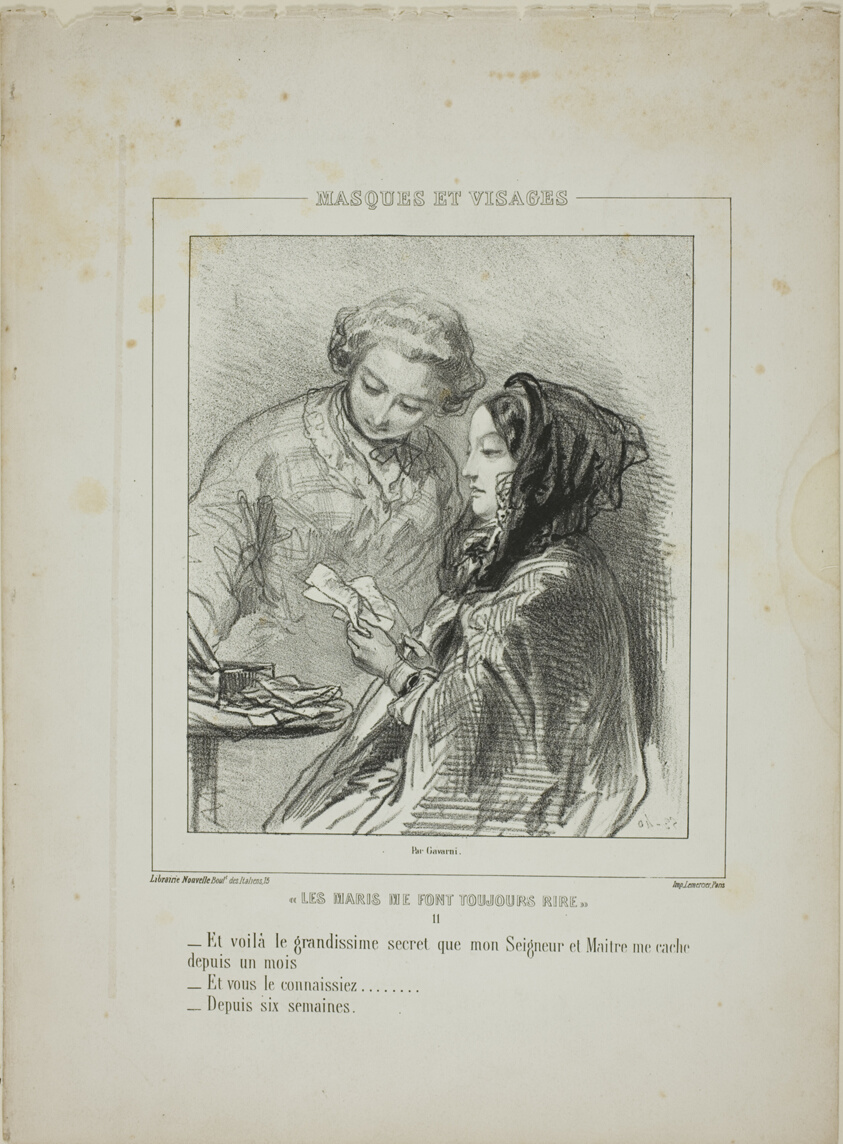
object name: Print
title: Les maris me font toujours rire: Et voilà le grandissime secret...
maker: Paul Gavarni (French, 1804-1866)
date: 1852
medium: Lithograph in black on cream wove paper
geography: France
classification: lithograph; print; prints and drawing